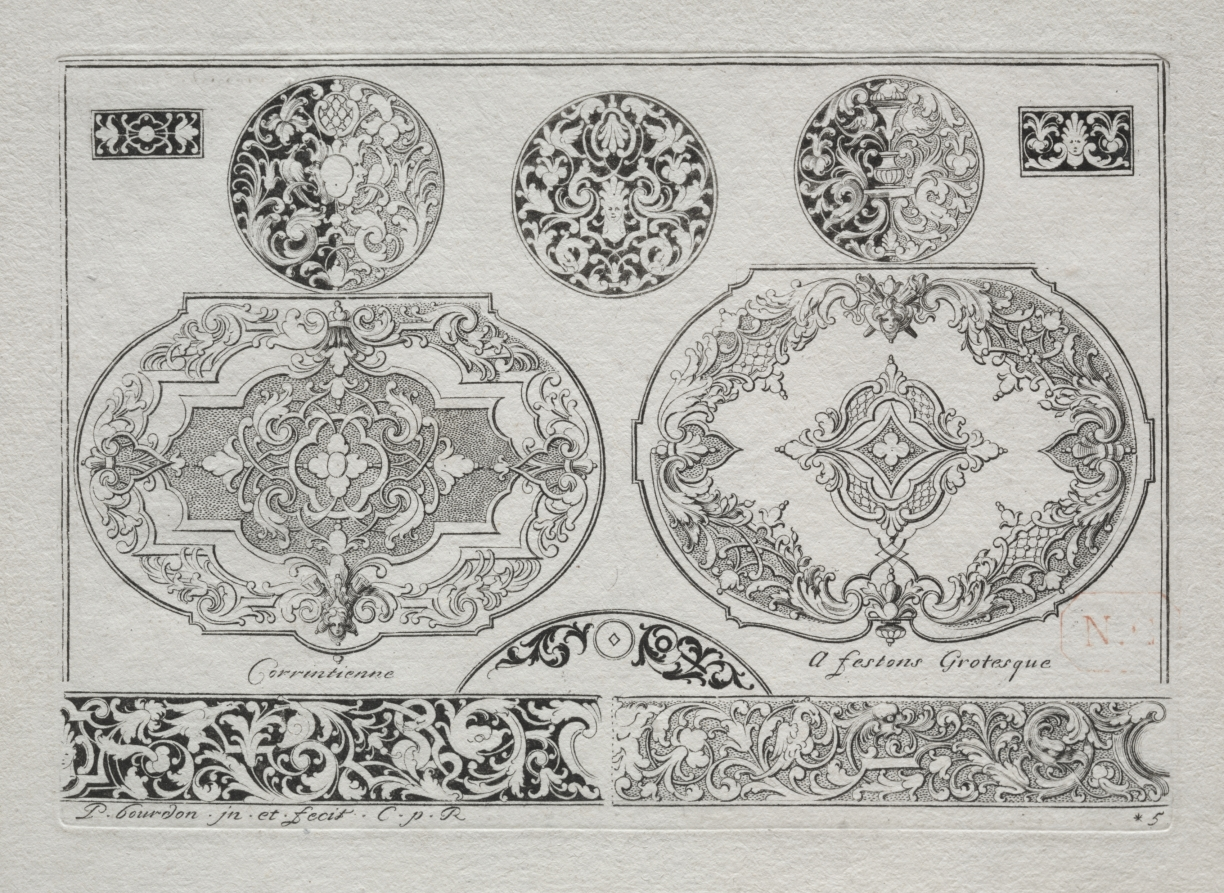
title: # 5 from " Livre second essais de gravjre " second book of Engraved Designs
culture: France, 18th century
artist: Pierre Bourdon (French)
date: c. 1703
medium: etching and engraving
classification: Print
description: The title page for this set of prints suggests that Bourdon’s designs are “useful for clockmakers, goldsmiths, chiselers, engravers and other people.” These craftsmen who made ornamented objects, such as the boxes and pistol below, sometimes consulted printed designs for inspiration. However, pattern prints similar to Bourdon’s also catered to aristocrats and wealthy professionals who pursued knowledge about styles and artists as a form of entertainment.